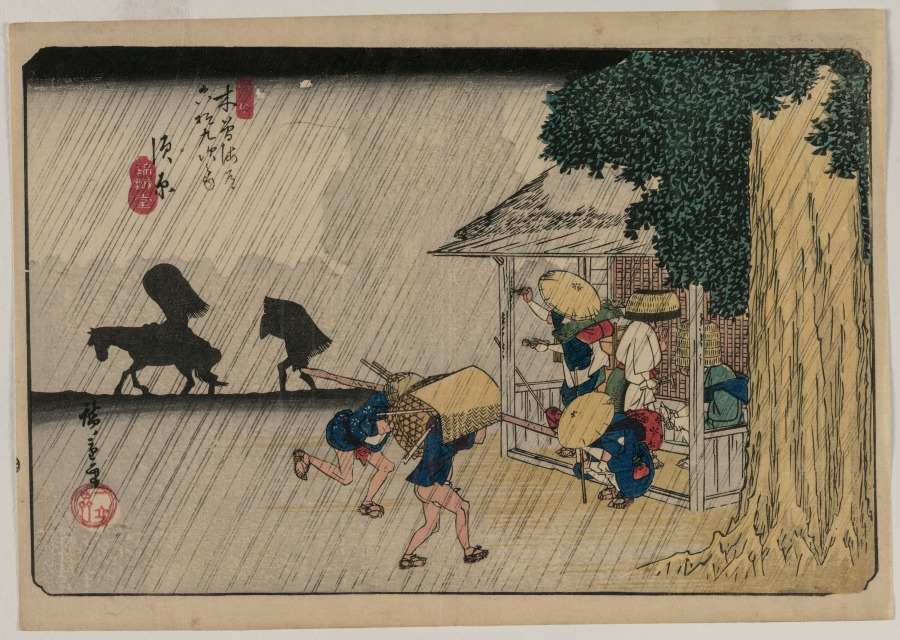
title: Suhara, from the series Sixty-Nine Stations of the Kisokaido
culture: Japan, Edo period (1615–1868)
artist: Utagawa Hiroshige (Japanese, 1797–1858)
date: 1835 or 1836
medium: color woodblock print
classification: Print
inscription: Signature: Hiroshige ga. Artist Seal: Ichiryusai. Publisher: Iseya Rihei (Kinjudo). Censorship Seal: kiwame.